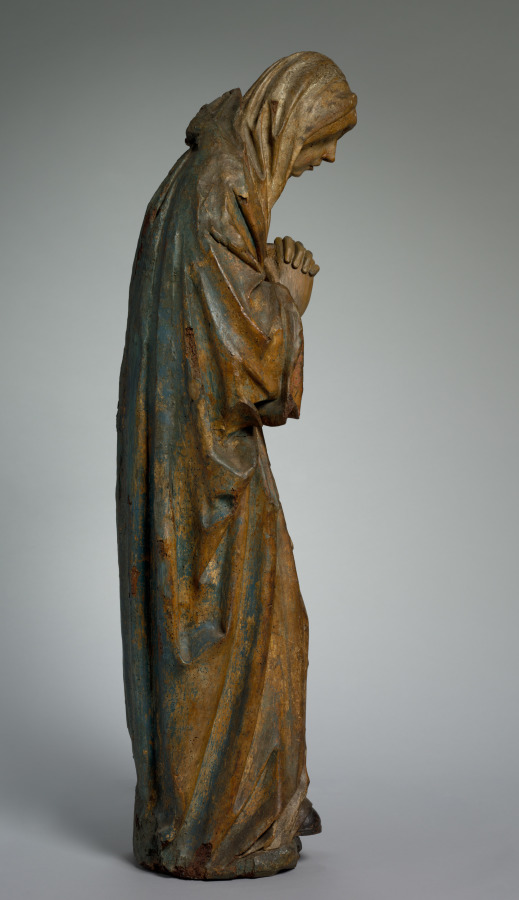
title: Virgin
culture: France, Champagne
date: 1510–15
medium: painted oak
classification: Sculpture